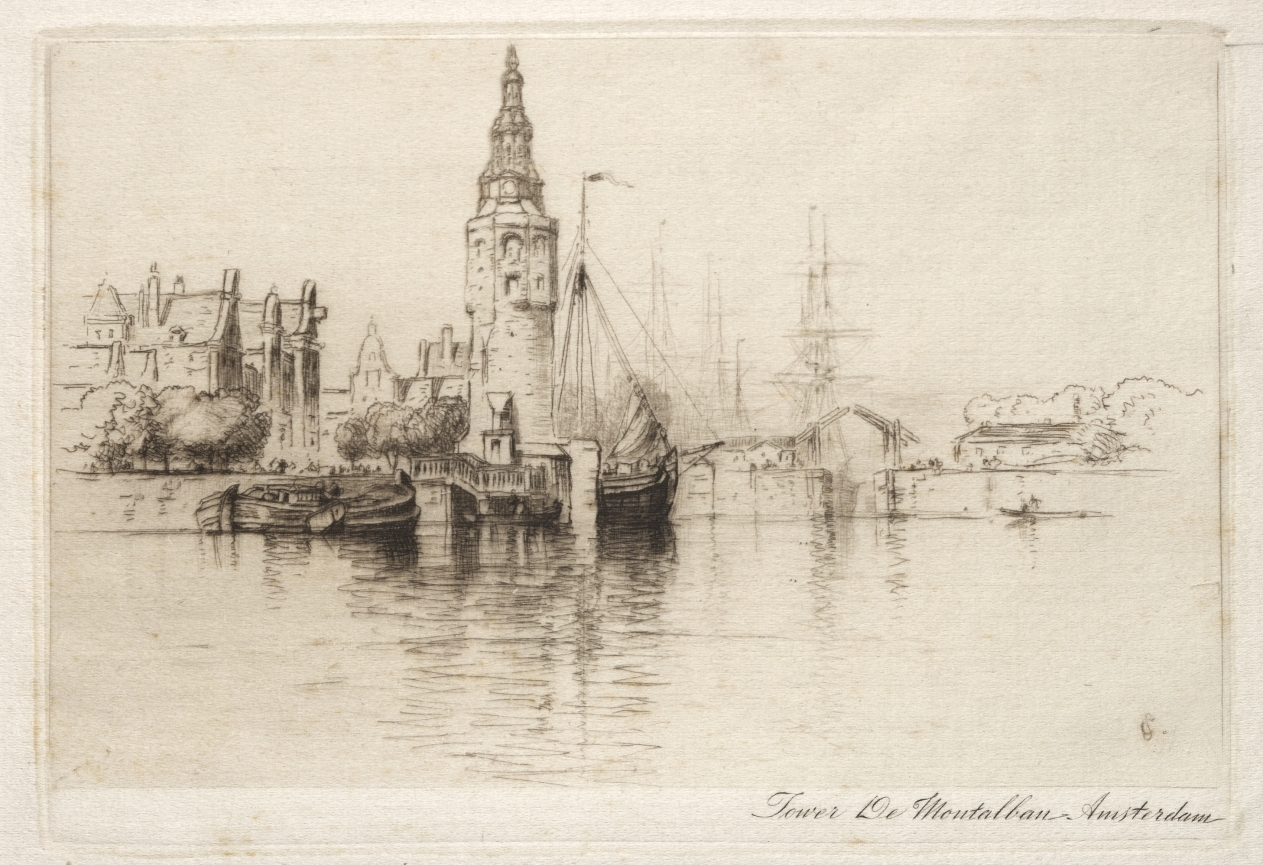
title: Montalbaans Tower, Province of North Holland, Netherlands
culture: America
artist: Samuel Colman (American, 1832–1920)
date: c. 1860–90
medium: etching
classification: Print